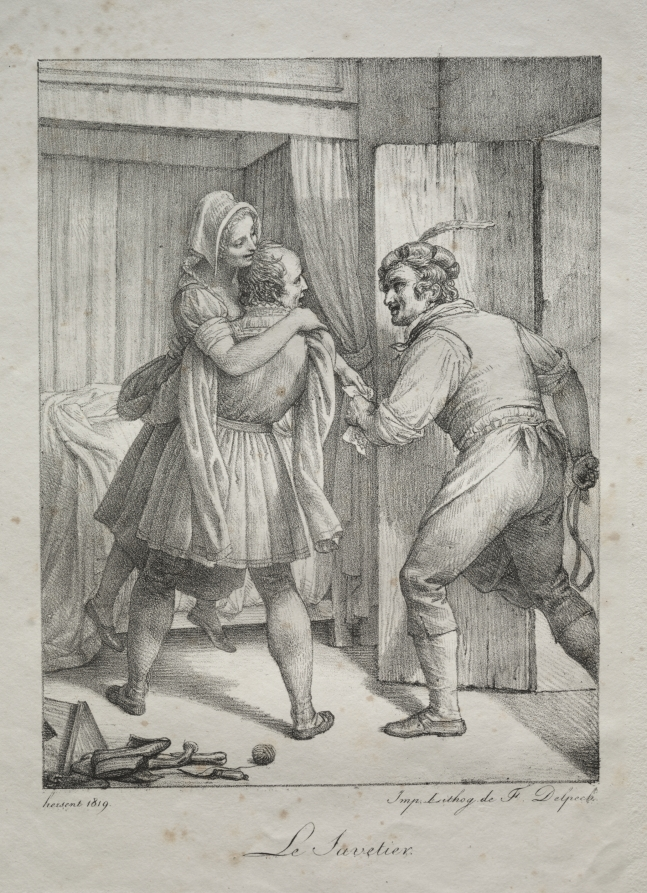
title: The Cobbler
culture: France, 19th century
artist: Louis Hersent (French, 1777–1860)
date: 1820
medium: lithograph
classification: Print